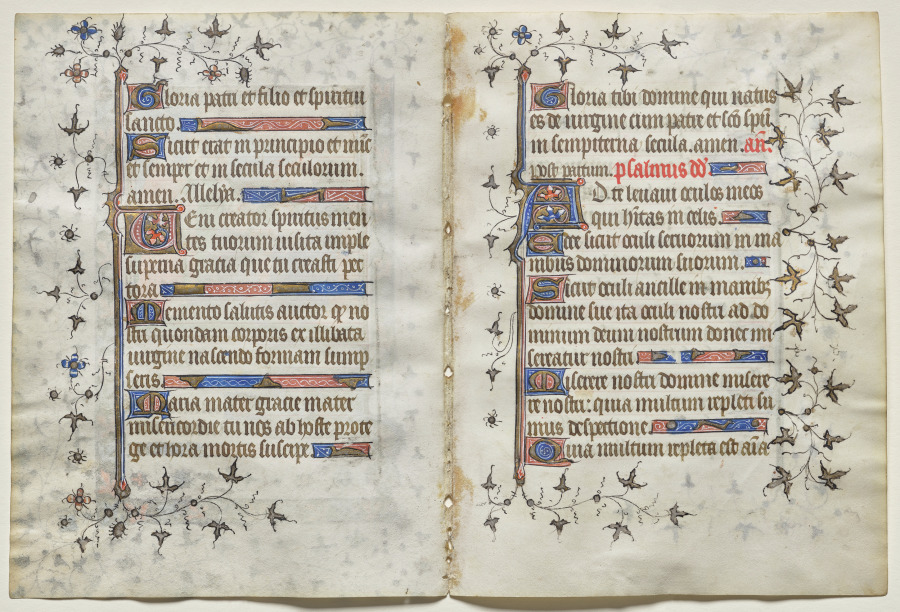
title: Bifolio from a Book of Hours: Text (verso)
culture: France, Paris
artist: workshop of Boucicaut Master (French, Paris, active about 1410–25)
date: c. 1415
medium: ink, tempera, and gold on vellum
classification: Manuscript